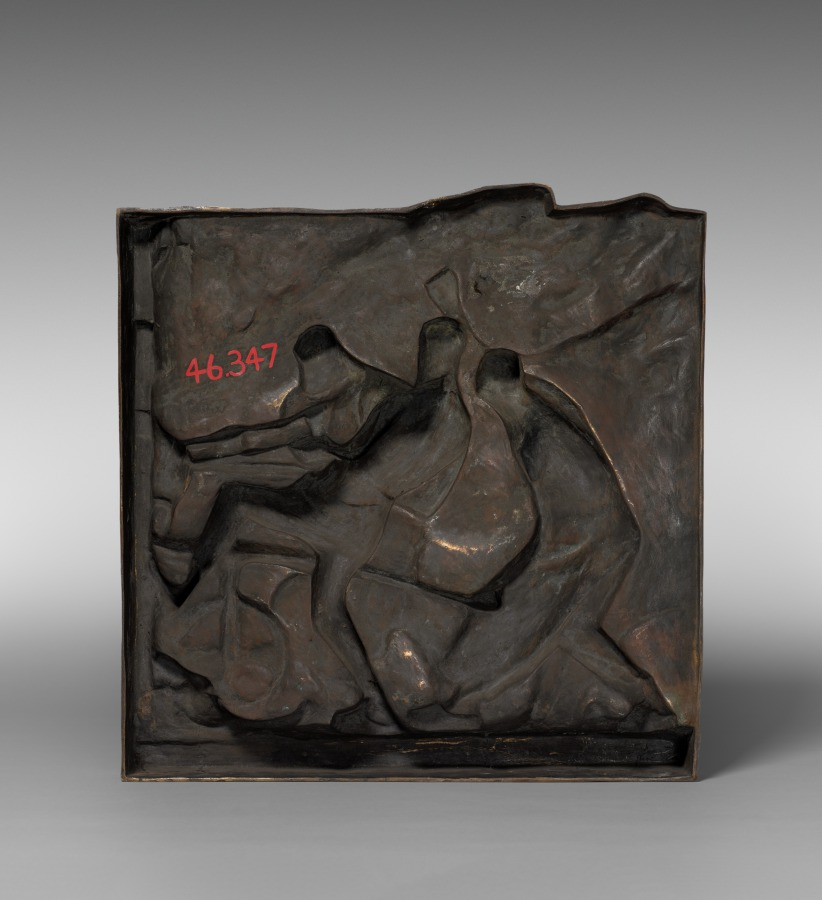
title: The Furnace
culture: Belgium, 19th century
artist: Constantin Meunier (Belgian, 1831–1905)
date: c. 1890 – 1900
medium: bronze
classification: Sculpture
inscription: Signed lower right side: "C. Meunier"; inscribed lower right: "B. Verbeyot, Fondeur, Bruxelles."